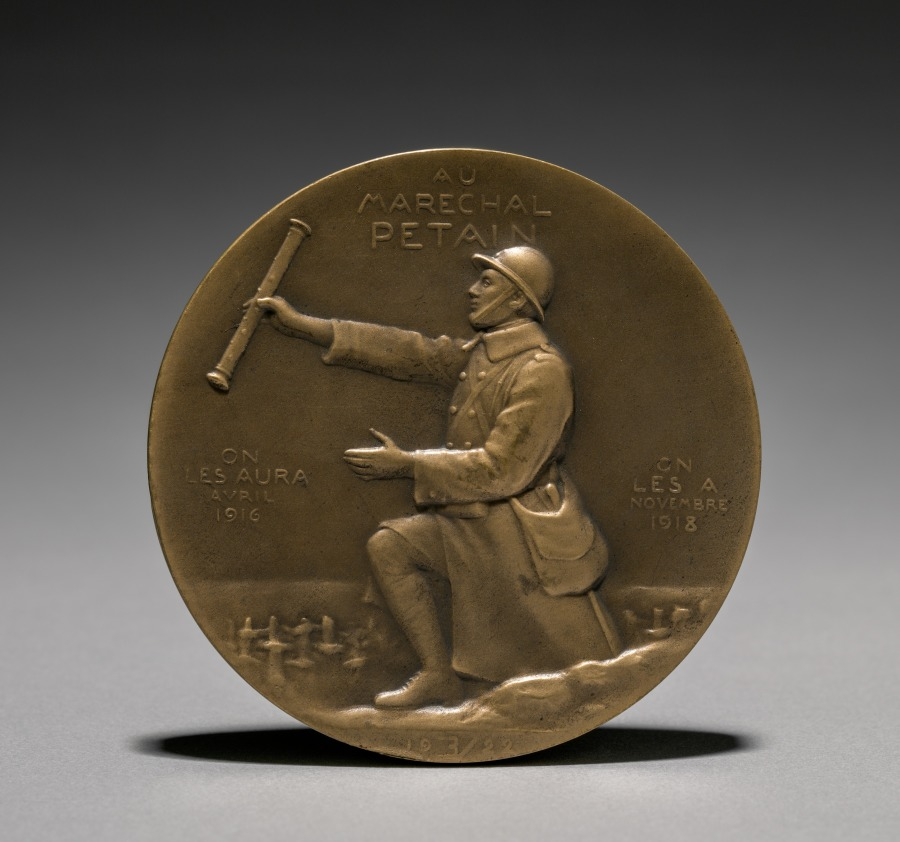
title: Petain Medal (reverse)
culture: France, early 20th century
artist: Èmile Séraphin Vernier (French, 1852–1927)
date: 1922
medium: bronze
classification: Metalwork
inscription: "AU MARECHAL PETAIN. ON LES AURA AVRIL 1916. ON LES A NOVEMBRE 1918."